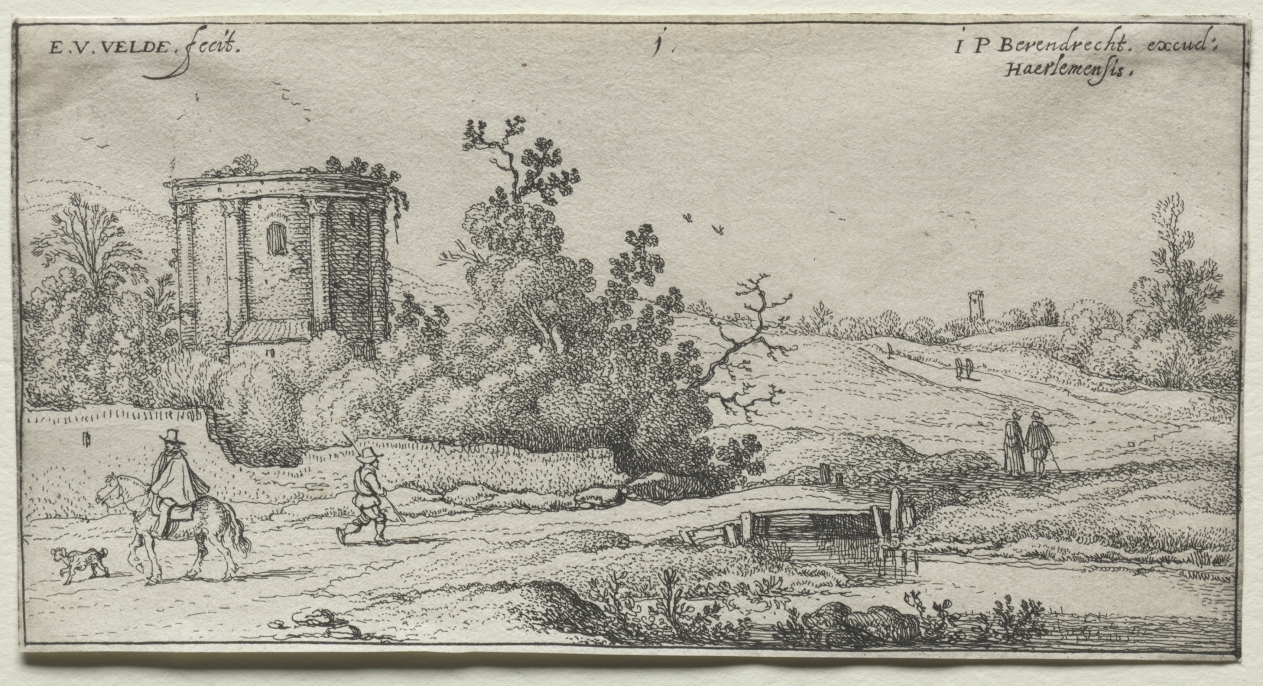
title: Landscapes: Landscape with Ruins of a Roman Temple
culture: Netherlands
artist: Esaias van de Velde (Dutch, 1587–1630)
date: 1615–45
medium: etching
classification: Print